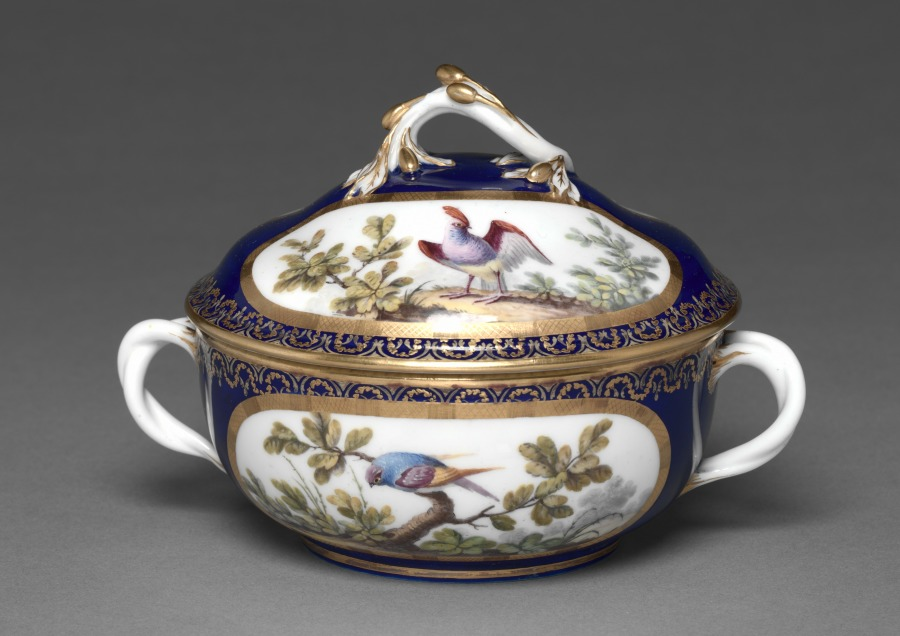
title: Covered Broth Bowl and Stand (Écuelle ronde et plateau ovale)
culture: France, Sèvres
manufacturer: Sèvres Porcelain Factory (French, est. 1756)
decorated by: François-Joseph Aloncle (French)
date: 1772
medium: soft-paste porcelain with enamel and gilt decoration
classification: Ceramic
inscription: Interlaced Ls with date letter 'T'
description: Birds were collected in all forms during the 18th century following an increased European interest in natural history. The birds on this bowl and stand were painted by François-Joseph Aloncle, one of the Sèvres porcelain factory’s principal bird painters. Small, two handled bowls like this one would hold broths or soups consumed by an individual during the toilette, a ritual of washing and dressing practiced by the 18th-century French elite.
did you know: Two different colors of gold decorate these objects’ borders, exemplifying more complex forms of gilding introduced in the 1770s.